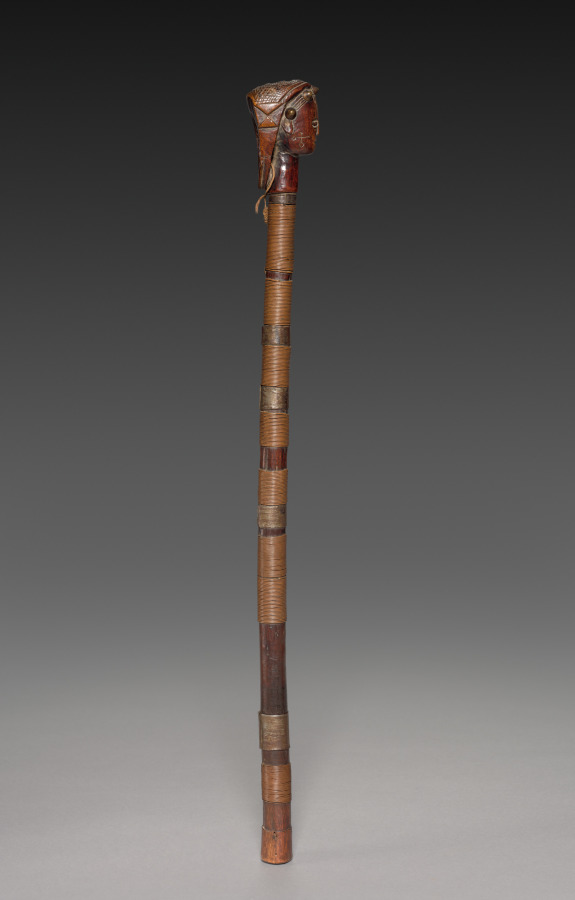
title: Scepter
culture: Africa, Central Africa, Angola, Ovimbundu-style maker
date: late 1800s or early 1900s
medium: Wood, copper alloy, upholstery studs, iron alloy, and cotton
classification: Implements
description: Staffs and scepters as well as tobacco pipes and mortars are among the most important sculptural creations to stem from the Ovimbundu peoples, a Central African culture. All of these object types have associations with ideas of class, status, and power. This scepter has a handle wrapped in thin copper wire that forms wide bands of alternating metal and wooden passages. Its finial is a human head whose carved headdress or hairstyle is ornamented with round-headed metal tacks.